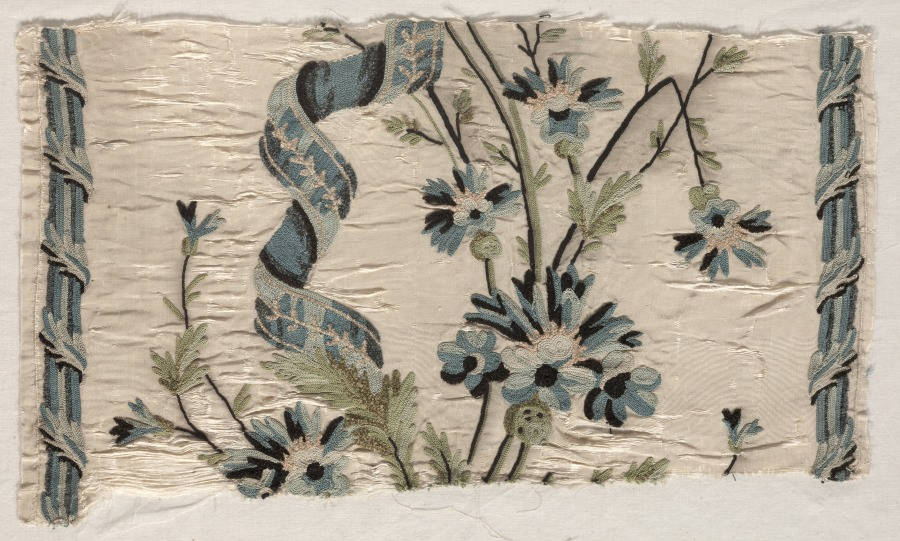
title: Two Pieces of Embroidery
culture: France, 18th century, Period of Louis XV (1723-1774)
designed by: Philippe de Lasalle (French, 1723–1805)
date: 1723–1774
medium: embroidery, silk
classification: Embroidery